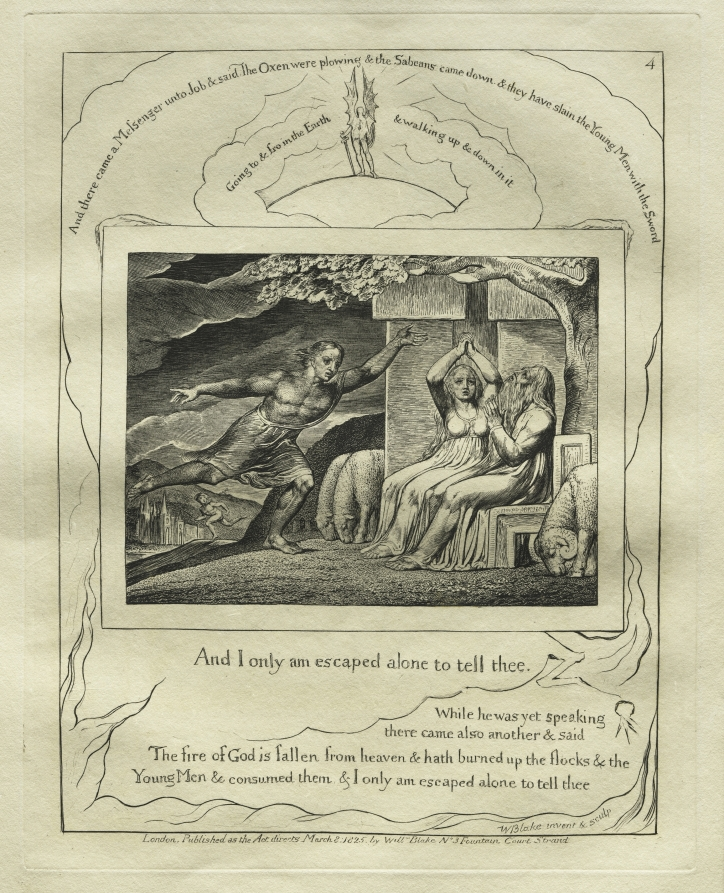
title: The Book of Job: Pl. 4, And I only am escaped alone to tell thee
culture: England, 19th century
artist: William Blake (British, 1757–1827)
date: 1825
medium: engraving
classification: Print